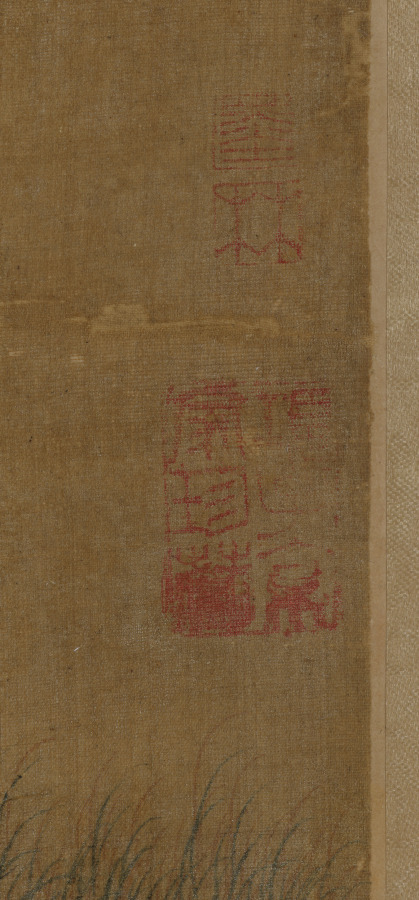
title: Hunting on Horses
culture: China, Ming dynasty (1368-1644) - Qing dynasty (1644-1911)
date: c. 1600s–1700s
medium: Hanging scroll; ink and color on silk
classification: Painting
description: This large-scale hanging scroll depicts a party hunting for waterfowl along a riverbank in the springtime. The leader is distinguished from the other five mounted hunters by his purple robe with golden dragon patterns and his white horse with a red tassel. He and his horse maintain still, dignified postures as a small white falcon captures one of the wild geese. Equestrian pursuits and hunting were particularly popular among the Khitan (also spelled “Qidan”) and Jurchen, ethnic groups who lived along China’s northeastern border. Their nomadic lifestyle intrigued the Chinese court and inspired Chinese artists to develop a painting genre showing them hunting.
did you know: This falconry scene includes one white hunting dog and four trained hunting birds.